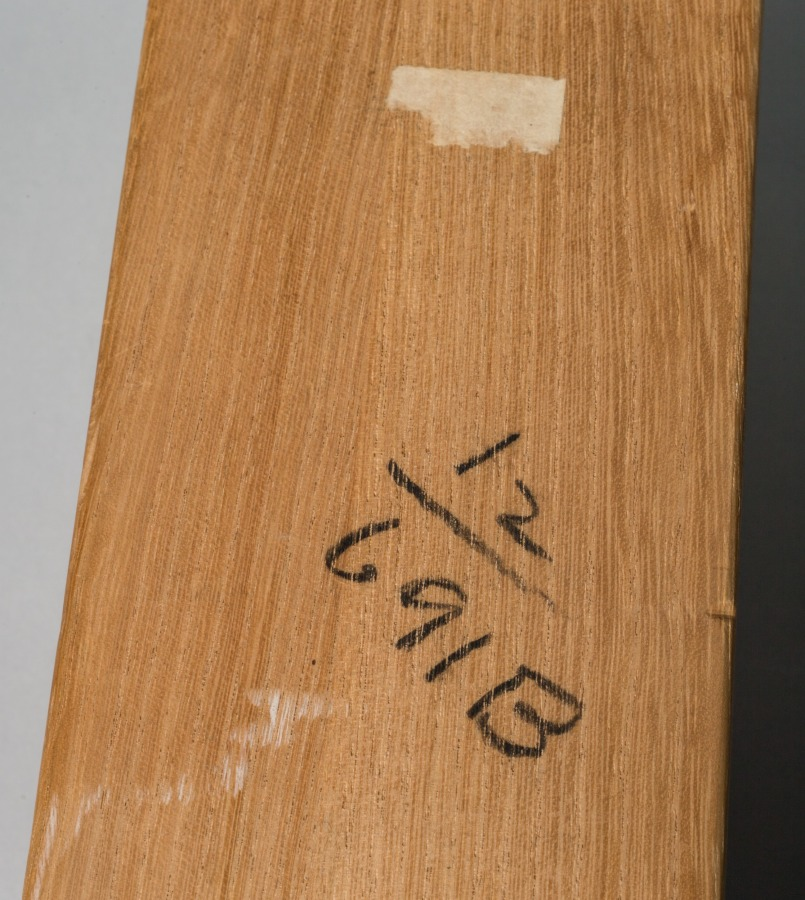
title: Courtesan and Attendants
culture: Japan, Edo period (1615–1868)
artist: attributed to Engetsudō (Japanese)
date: c. 1748–51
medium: hanging scroll; ink and color on paper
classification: Painting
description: The courtesan wears a pair of tall, lacquered wooden clogs and heavy robes, indicating it is winter. The elaborate span of her tortoiseshell comb in her fashionable coiffure enhances her glamorous appearance. Her blue-and-white striped obi is tied in a loose bow in front, typical for her profession. The round, stylized cherry blossom crest of her "house" (brothel), partially visible on her shoulder just above the shawl, also appears on the robes of her two attendants (kamuro). The attendants hold shuttlecocks, used in a game associated with New Year celebrations. One girl stares out at the viewer; the other looks back. The frontal view of the attendant’s face is somewhat rare in ukiyo-e painting and prints.